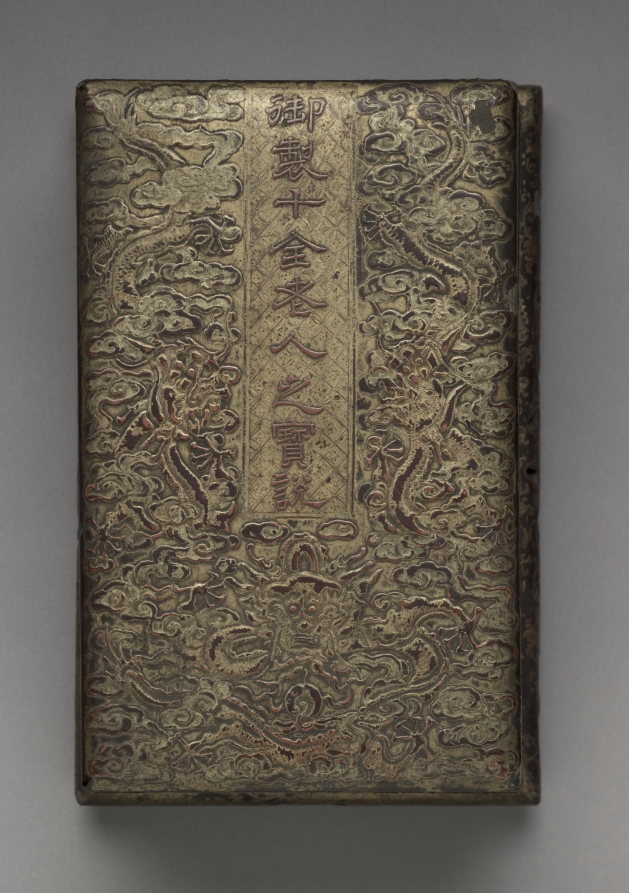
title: Box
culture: China, Qing dynasty (1644-1911)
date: 1750–99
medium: pressed sizing on wood painted with lacquer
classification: Lacquer